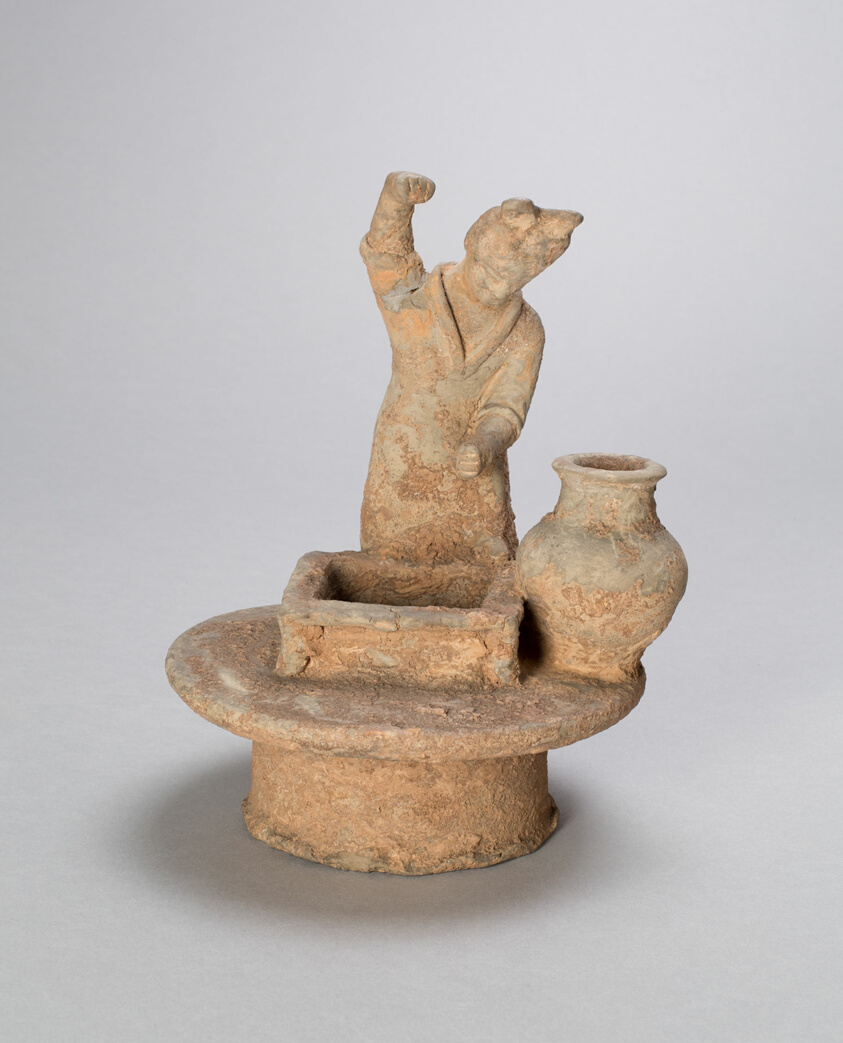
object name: Sculpture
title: Woman Standing Over a Well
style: Chinese (culture or style)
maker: China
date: Northern Wei Dynasty (386–535), early 6th century; with later restorations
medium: Earthenware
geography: China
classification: ceramics; asian art; sculpture